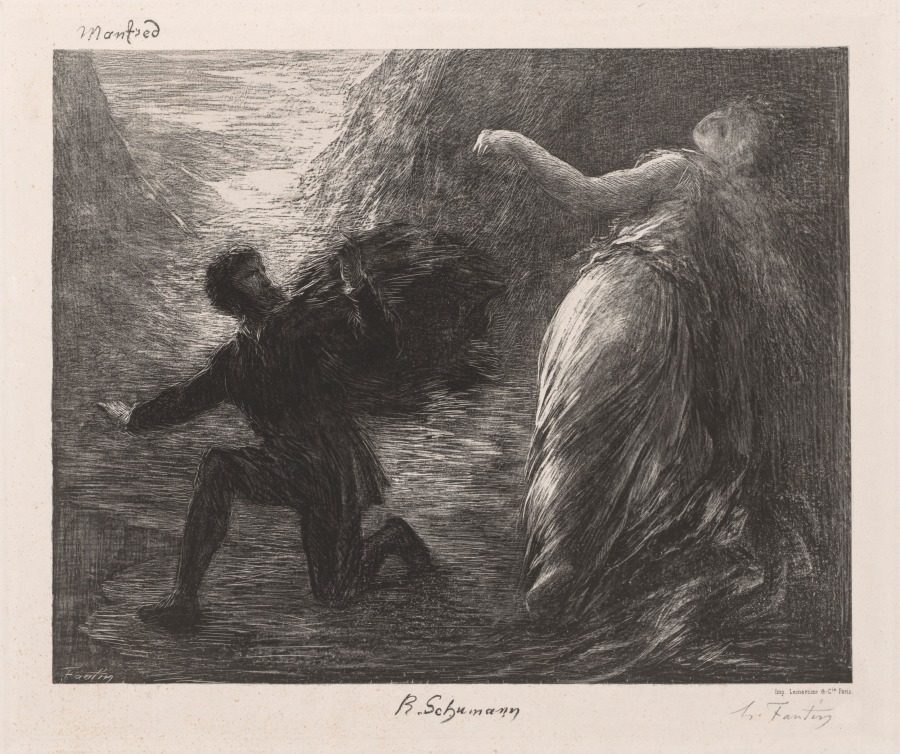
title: Manfred and Astarté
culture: France, 19th century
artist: Henri Fantin-Latour (French, 1836–1904)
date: 1879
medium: lithograph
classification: Print